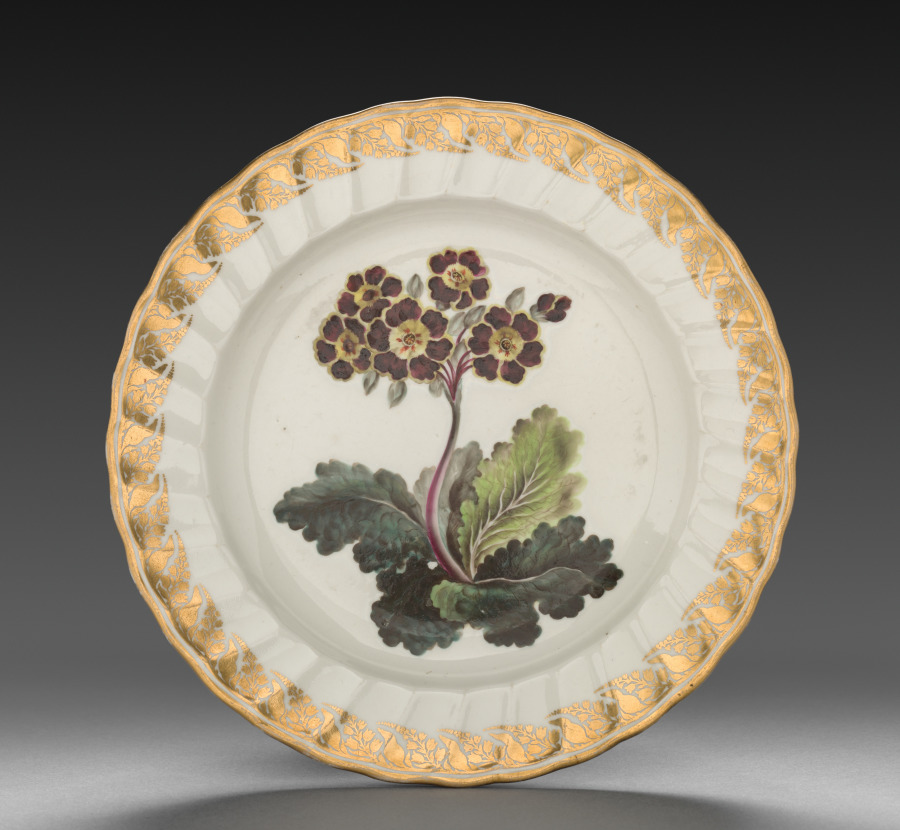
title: Plate from Dessert Service: Polyanthus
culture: England, Derby, 18th century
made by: Derby (Crown Derby Period) (British)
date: c. 1800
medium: porcelain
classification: Ceramic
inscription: inscribed in blue on back: Polyanthus./crown/crossed batons and dots/D/115.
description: Each dish is decorated with recognizable plants, the names of which are inscribed on the base in both Latin and English. Identifying the blossoms only became customary in the late 18th century when a single piece of porcelain was decorated with one species, and flowers were represented along with leaves, stems, seed pods, and roots. All of this reflects Carolus Linnaeus’s recent invention of a scientific method to categorize all known flora. The decorations on the Derby factory’s products derive from contemporary English botanical publications. For instance, illustrations in William Curtis’s The Botanical Magazine served as models for the French marigold and nettle-leaved bell flower on the dessert service.